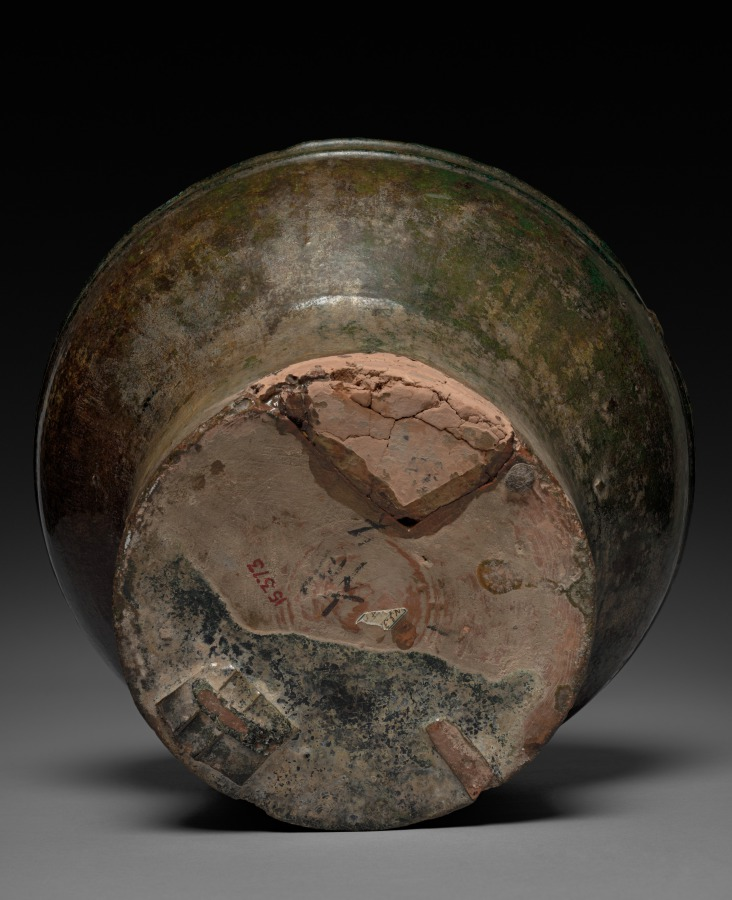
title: Jar (Hu)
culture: China, Han dynasty (202 BCE–220 CE)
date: 206 BCE–220 CE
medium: earthenware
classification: Ceramic